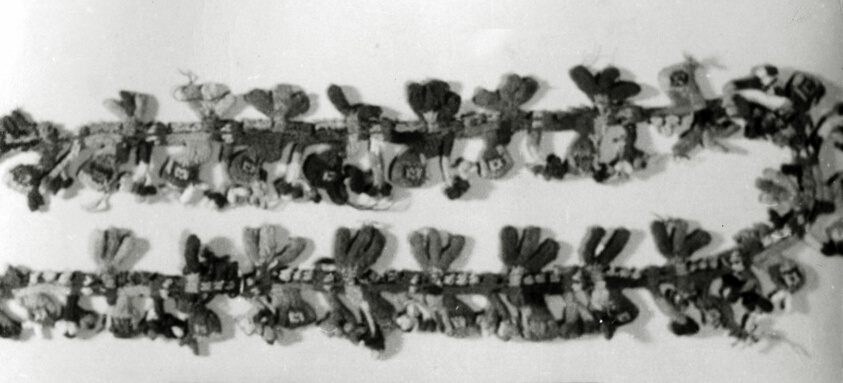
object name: Textile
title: Border Fragment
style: nazca, andean, andes, Pre-Columbian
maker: Nazca; South coast, Peru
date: 100 B.C./A.D. 200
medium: Wool (camelid), tubular cross-knit looping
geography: Peru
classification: textile; weaving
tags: super/natural